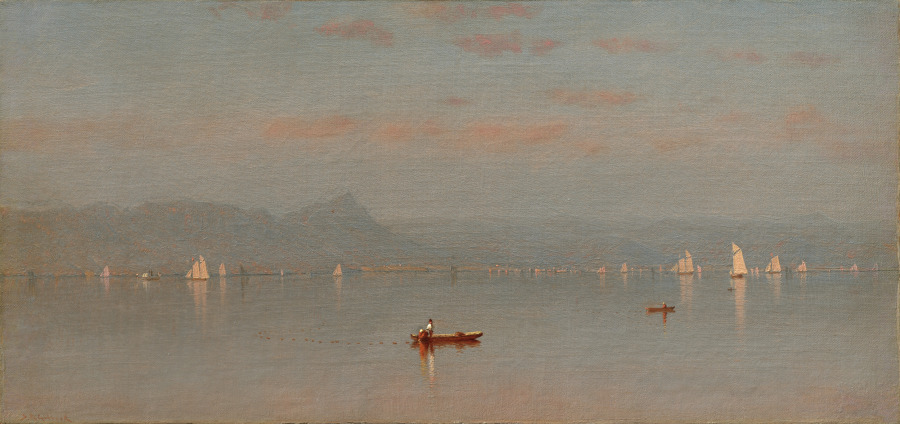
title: Haverstraw Bay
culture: America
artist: Sanford Robinson Gifford (American, 1823–1880)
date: 1868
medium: oil on canvas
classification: Painting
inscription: Signed lower left: S.R. Gifford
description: Located about 40 miles north of New York City, Haverstraw Bay is the widest point on the Hudson River. During the 1860s, it was a prime area for shad fishing, and Gifford’s painting records this activity taking place amid a delicately luminous morning haze.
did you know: Commercial and recreational fishing for now endangered American shad is currently prohibited on the Hudson River.